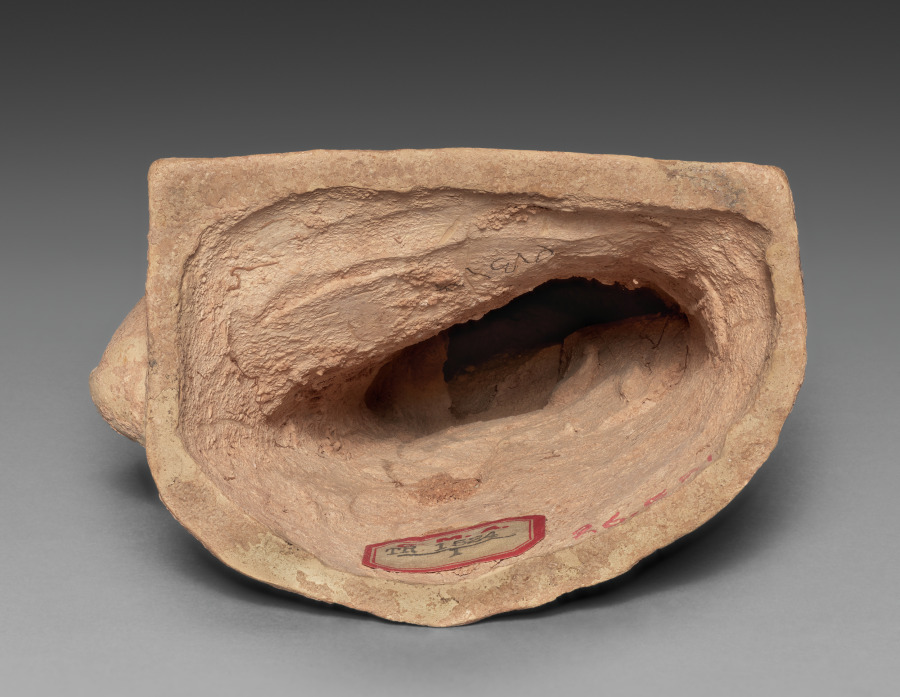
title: Figurine of Demeter with Pig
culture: Greece, Athens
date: 400s BCE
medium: terracotta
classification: Sculpture